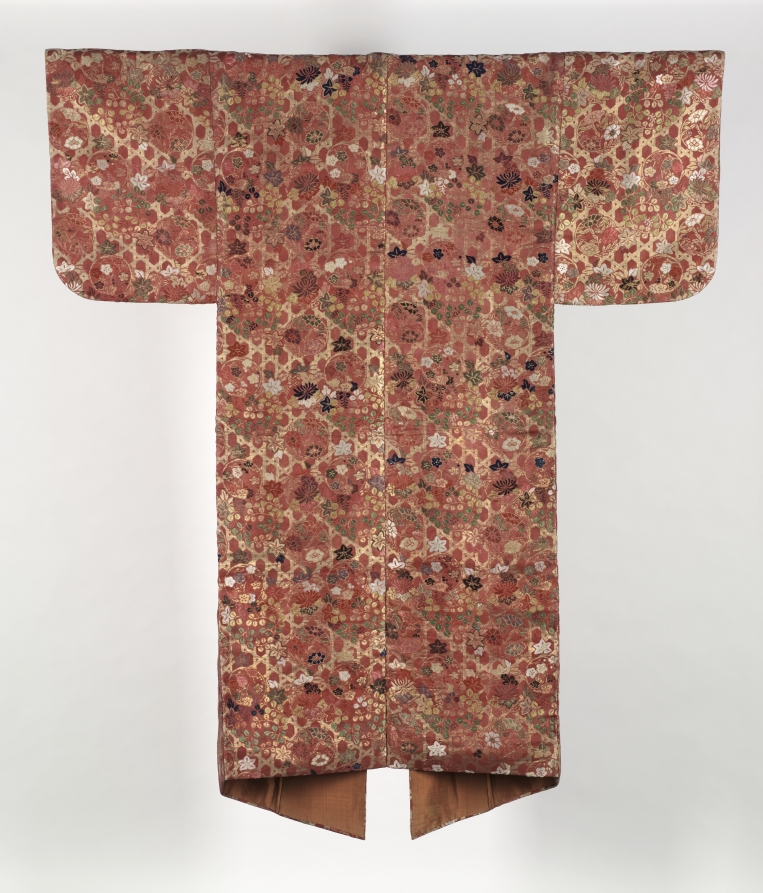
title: Noh Robe (Karaori)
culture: Japan, Edo period (1615–1868)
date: 1800–1850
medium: Brocaded silk with metal thread weft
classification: Garment